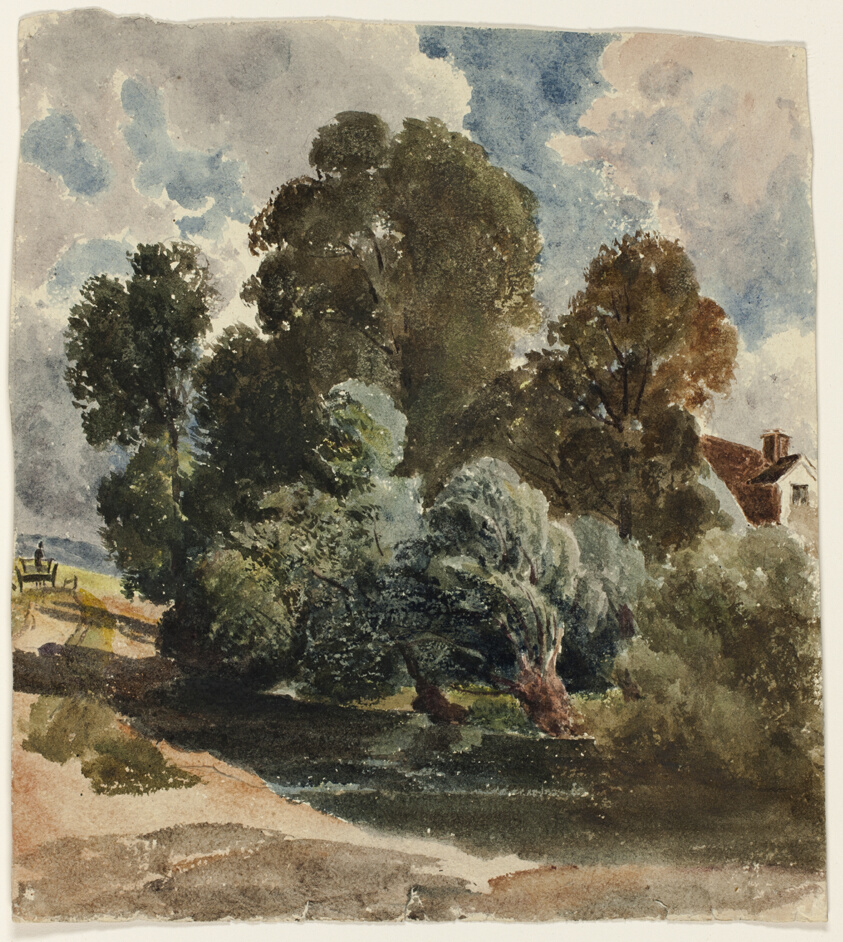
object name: Drawing and Watercolor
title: Grove of Trees (recto), Sketch of Aderley Church (verso)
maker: Peter De Wint (English, 1784-1849)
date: c. 1830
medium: Watercolor over graphite on paper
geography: England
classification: watercolor; drawings (visual works); prints and drawing